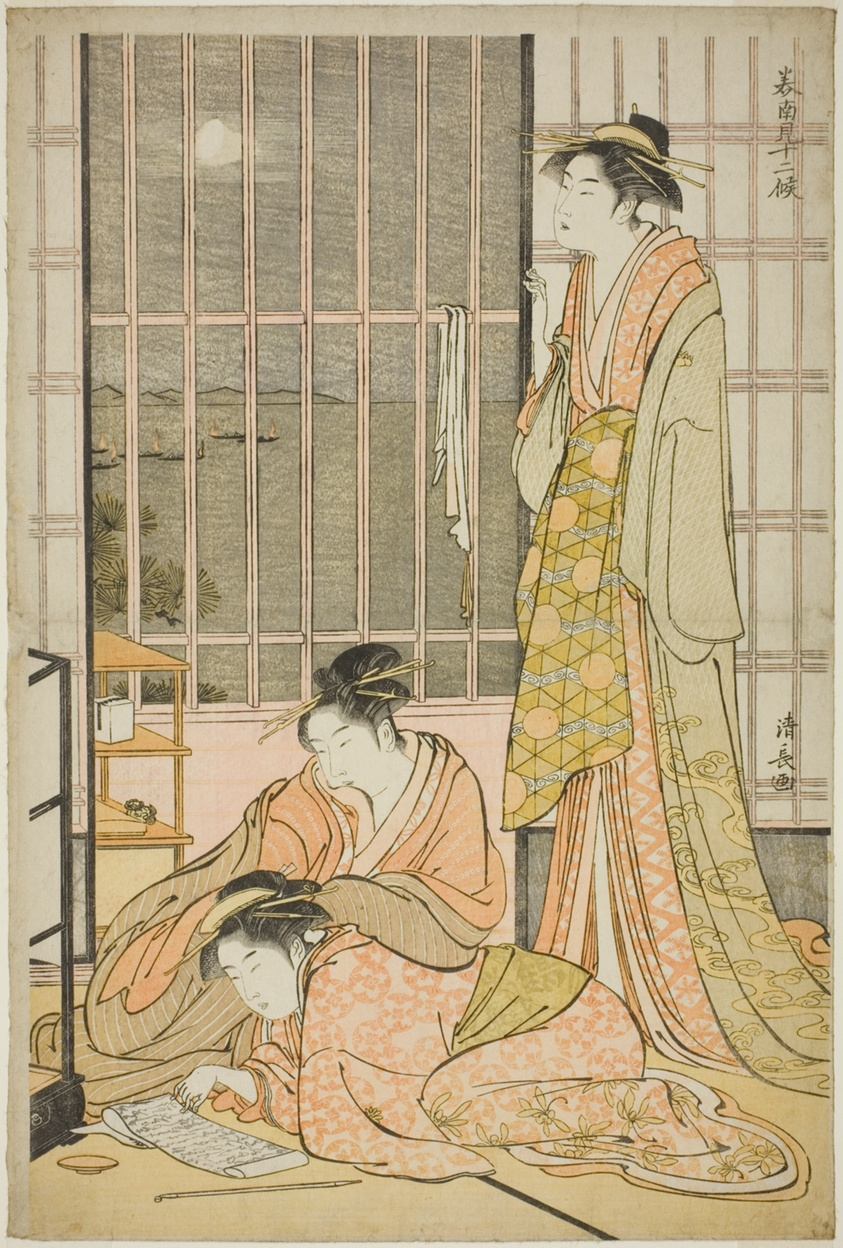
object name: Print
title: The Ninth Month, from the series "Twelve Months in the South (Minami juni ko)"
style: Japanese (culture or style)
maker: Torii Kiyonaga (Japanese, 1752-1815)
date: c. 1784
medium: Color woodblock print; oban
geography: Japan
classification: woodblock print; print; asian art